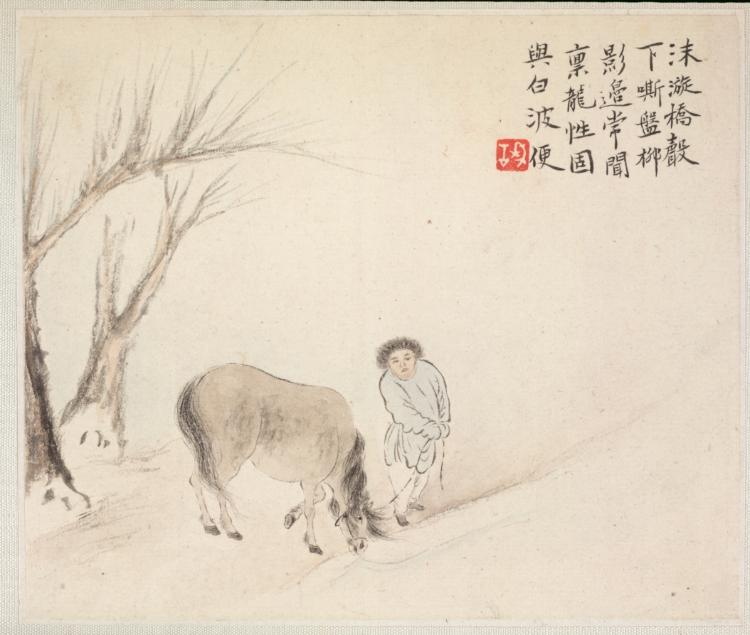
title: Album of Landscape Paintings Illustrating Old Poems: Boy Holding a Horse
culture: China, Qing dynasty (1644-1911)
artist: Hua Yan (Chinese, 1682–c. 1765)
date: 1745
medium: Album leaf; ink and light color on paper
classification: Painting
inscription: Calligraphy and seal upper right corner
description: Hua Yan is one of the Eight Eccentrics of Yangzhou, who rejected orthodox ideas about painting.